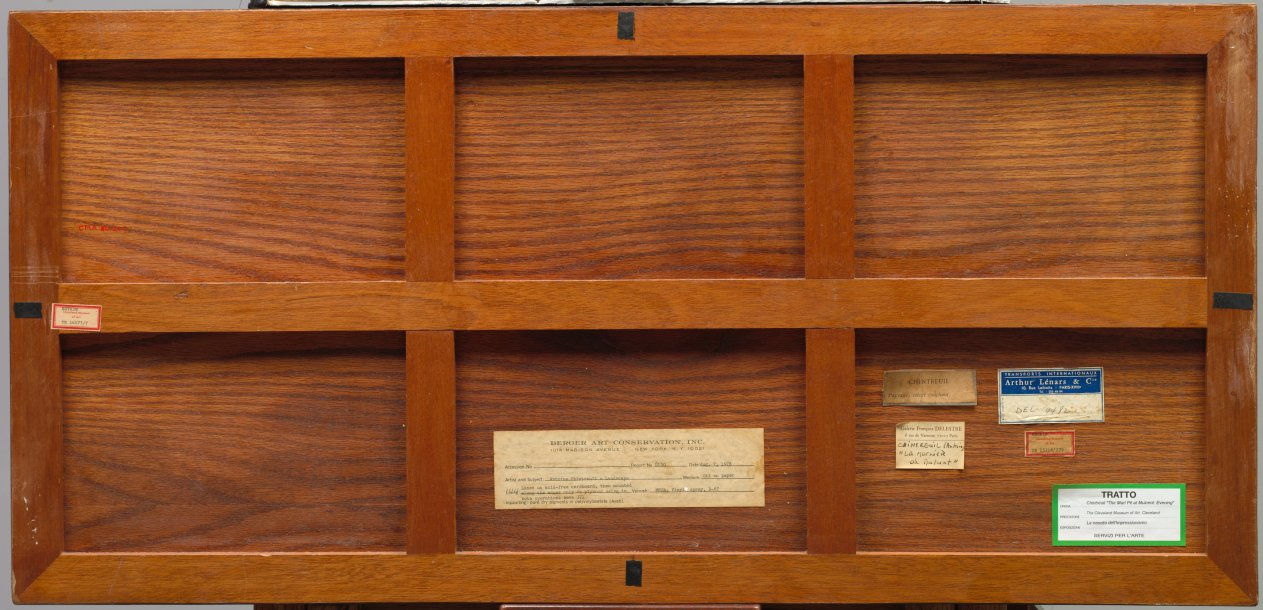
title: The Marl Pit at Mulcent: Evening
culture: France, 19th century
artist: Antoine Chintreuil (French, 1814–1873)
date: after 1857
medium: oil on paper, mounted to cardboard, mounted to plywood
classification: Painting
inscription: Signed lower left: Chintreuil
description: Marl is a crumbly mixture of clays, calcium, and magnesium carbonates, often used as fertilizer for lime-deficient soils.